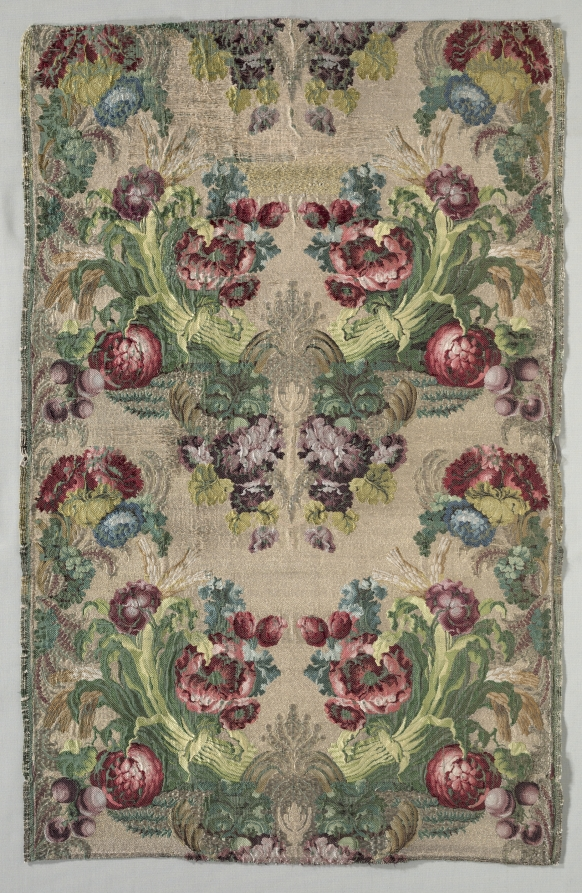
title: Length of Textile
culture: Italy, 18th century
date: 1700s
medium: brocade; silk and metal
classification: Textile